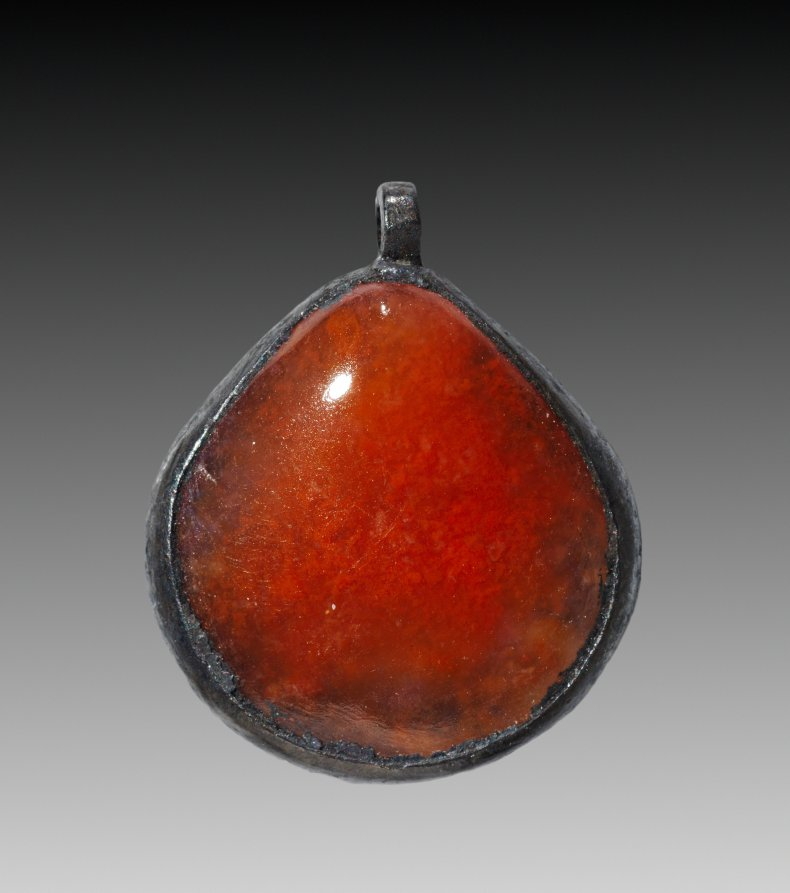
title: Oyster-Shell Pendant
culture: Egypt, Middle Kingdom (2040–1648 BCE), Dynasty 12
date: 1980–1801 BCE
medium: carnelian and silver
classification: Jewelry